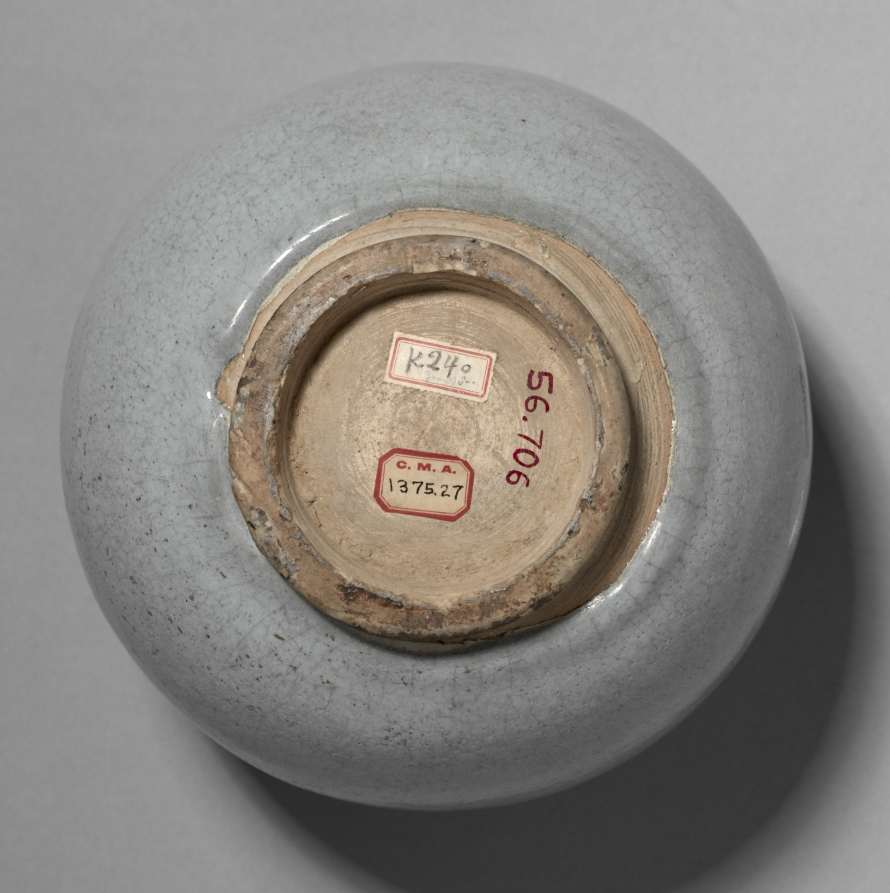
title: Two-Eared Jar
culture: China, Henan province, Yuxian, Jin dynasty (1115-1234) - Yuan dynasty (1271-1368)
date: 1200s-1300s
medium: Porcelaneous stoneware with blue glaze and splashes of purple, Jun ware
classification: Ceramic